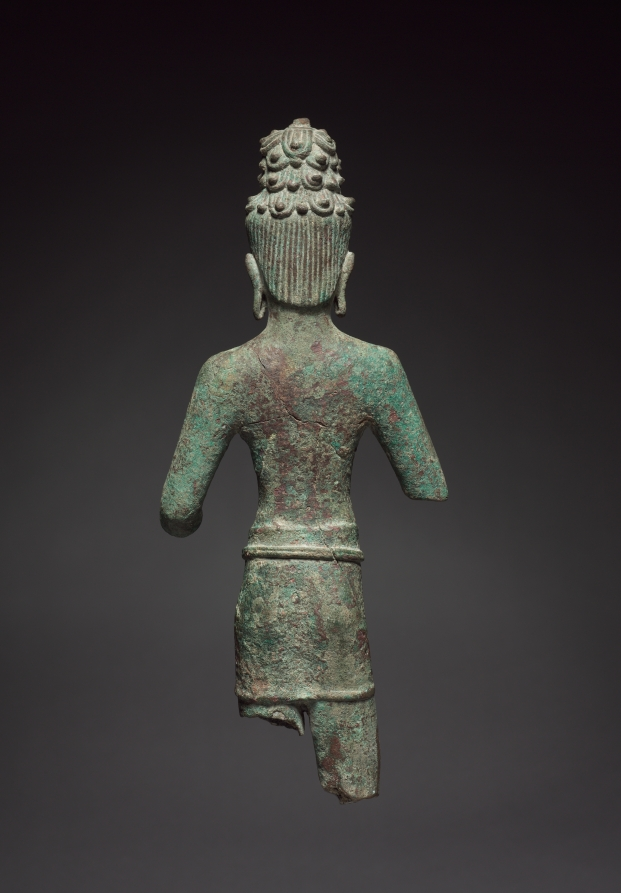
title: Bodhisattva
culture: Northeastern Thailand, Khorat Plateau, Buriram Province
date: 700s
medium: bronze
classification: Sculpture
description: This rare image survives from the early phase of Buddhist sculpture in Southeast Asia. Made in what is known as the Pra Khon Chai style, it has the characteristic sensitive expression, slender physique, and looped locks of hair. The broken limbs reveal the clay core over which the bronze was cast using the lost-wax method.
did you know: This sculputre was reportedly found as part of a group, some of which are much larger in scale.